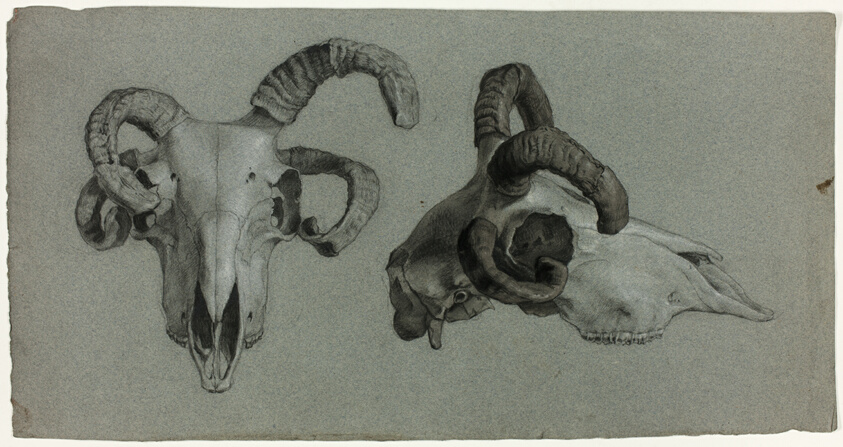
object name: Drawing and Watercolor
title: Rams' Skulls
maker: George Hayter (English, 1792-1871)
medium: Black and white chalk, with brush and brown wash and black crayon, on blue wove paper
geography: England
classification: chalk; drawings (visual works); prints and drawing; paper